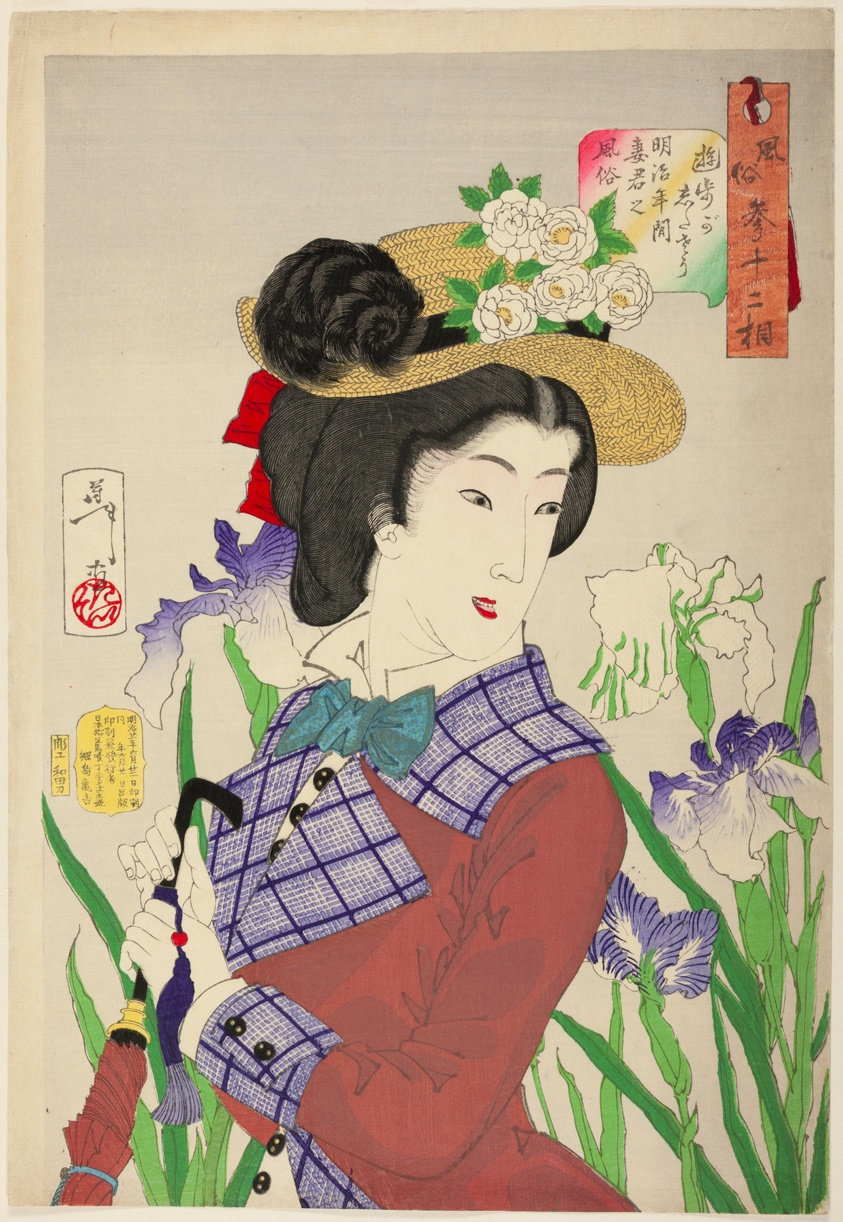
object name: Print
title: In The Mood for a Walk (Yuho ga shitaso), from the series "Thirty-two Aspects of Women (Fuzoku sanjuniso)"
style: Japanese (culture or style)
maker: Tsukioka Yoshitoshi (Japanese, 1839–1892)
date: 1888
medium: Color woodblock print; oban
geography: Japan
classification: woodblock print; print; asian art